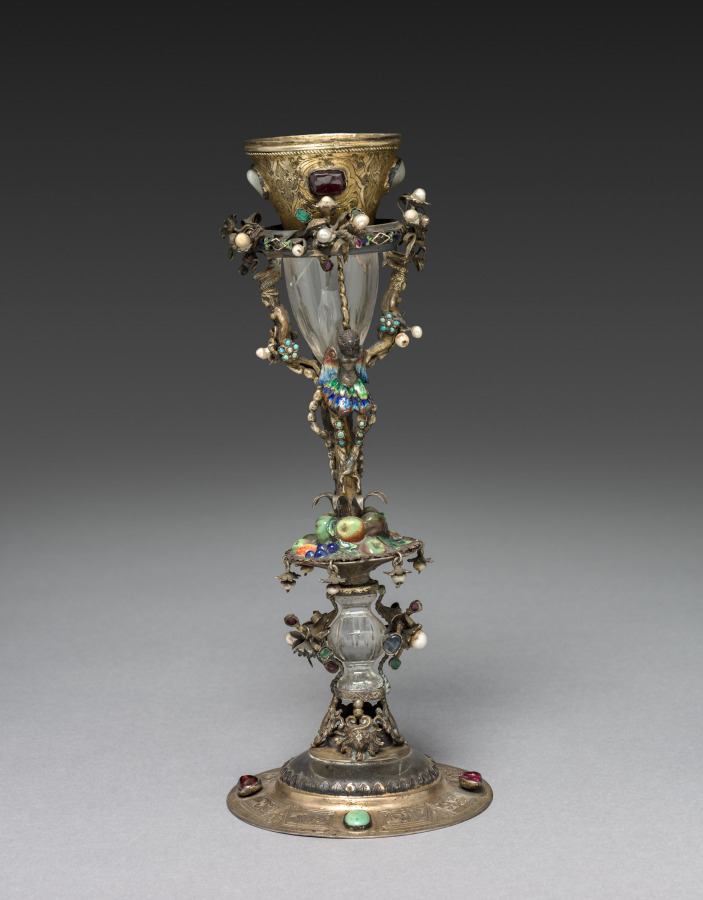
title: Blood Reliquary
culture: Italy (?), 16th century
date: 1500s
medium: gilt silver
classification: Metalwork